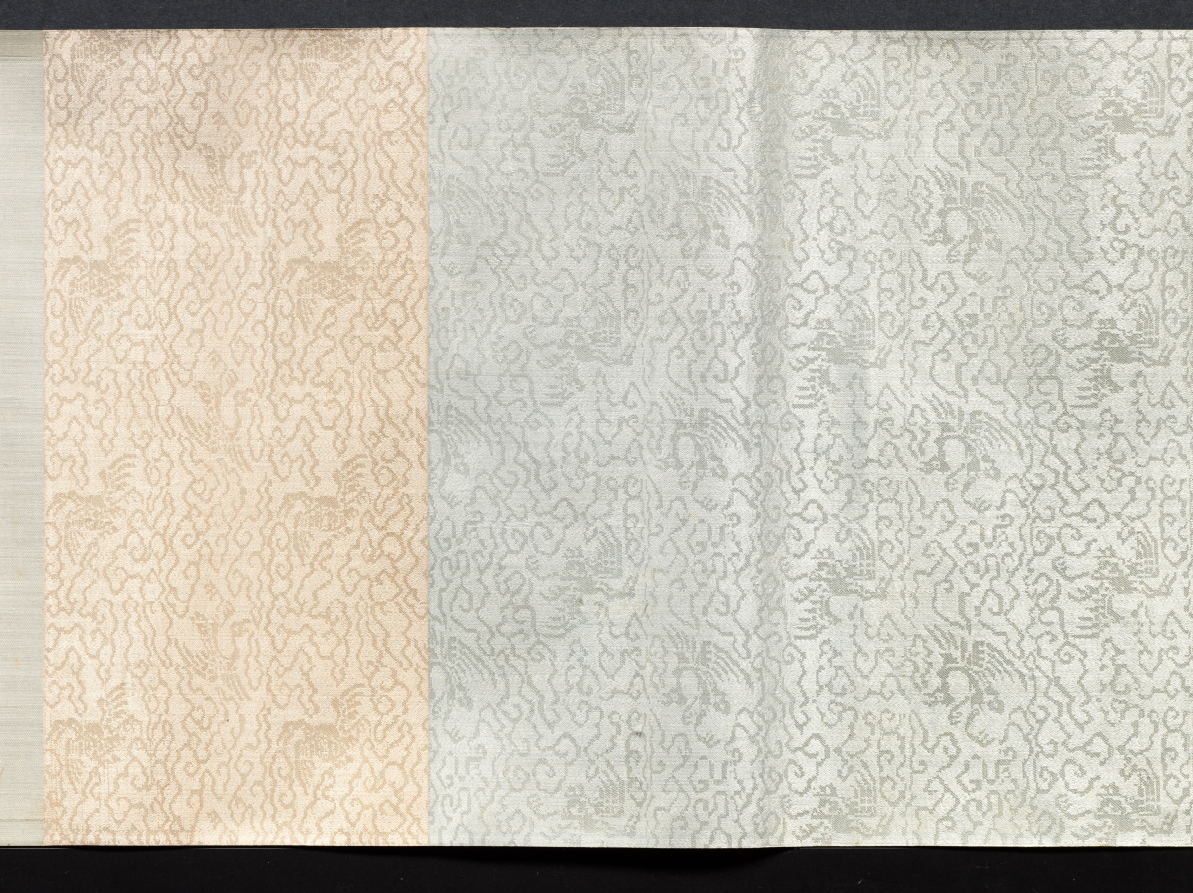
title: Autumn Mist in the Countryside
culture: China, Qing dynasty (1644-1911)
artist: Zou Zhe (Chinese, c. 1610-before 1688)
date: 1647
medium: handscroll, ink and color on paper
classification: Painting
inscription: Artist's inscription, signature, and seal: The first day of the sixth lunar month, the ting-hai year [1647], Tsou Che painted [this]. [seal] Fang-lu.